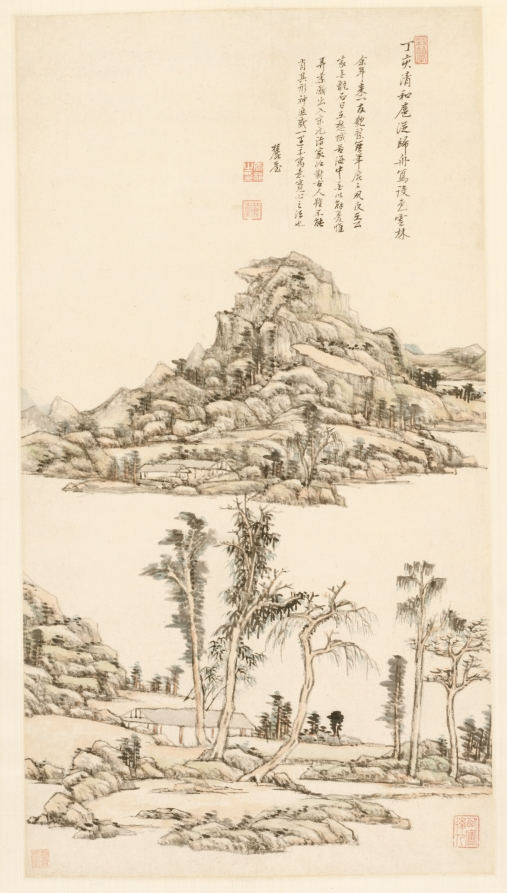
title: Landscape after Ni Zan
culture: China, Qing dynasty (1644–1911)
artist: Wang Yuanqi (Chinese, 1642–1715)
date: 1707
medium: Hanging scroll; ink and light color on paper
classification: Painting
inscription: [印]穀詒堂。 丁亥清和扈從歸舟寫設色雲林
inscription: 余年來一友匏系，簪筆鹿鹿。夙夜在公。家無甑石，日在愁城苦海中。無以解憂。惟弄柔翰出入宋元諸家，如對古人。雖不能肖其形神，庶幾一遇，亦寓意寬心之法也。麓臺。[印]原祁之印; 麓臺 [印, 右下]西廬後人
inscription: 1 additional seal of Pang Yuanji 龐元濟 (1864–1949) at the lower left corner.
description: Wang Yuanqi, an official in Emperor Kangxi’s (reigned 1662–1722) court, grew up in an artistic family. Like other mainstream painters of the Orthodox School, he followed a canon of earlier styles and artists endorsed by Ming calligrapher Dong Qichang (1555–1636). Here, Wang drew inspiration from Ni Zan (1301–1374), a Yuan dynasty painter known for his simple compositions and spare use of ink. Master Ni seldom used color, but Wang added green and ochre washes to the trees, cottages, and hills in this landscape. Painting was a way for Wang to relieve the pressures of his official duties.